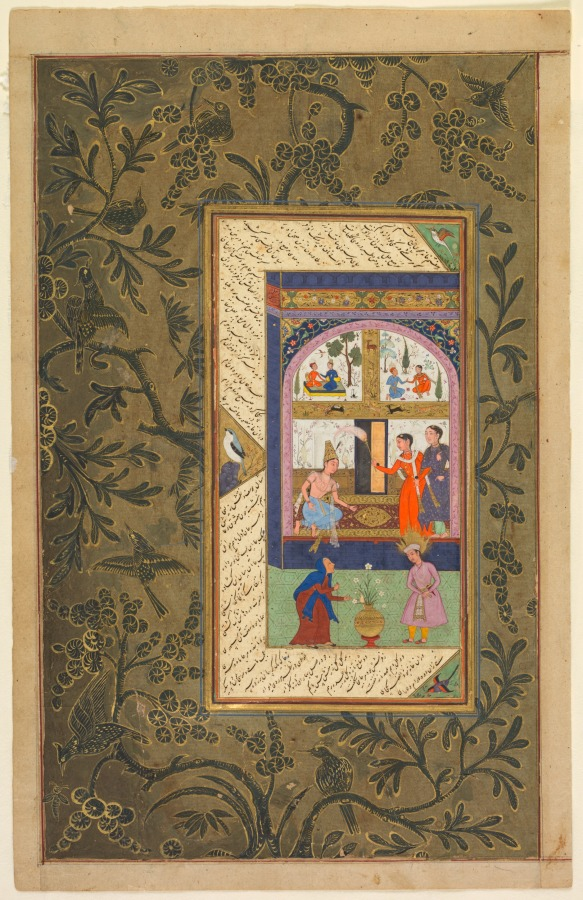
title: Zulaykha in her palace and as an elderly woman with Joseph (recto), from a Panj Ganj (Five Treasures) of Abd al- Rahman Jami (Persian, 1414–1492)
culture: Western Afghanistan, Herat (text); Mughal India (paintings)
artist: Mushfiq (Indian, active early 1600s)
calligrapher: Sultan 'Ali al-Mashadi (Iranian, 1430–1520)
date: 1603–7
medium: Gum tempera, ink, and gold on paper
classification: Painting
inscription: [[Upper left of painting, against a red background, in nasta’liq script]] ' amal - i Mushfiq sana 1015 Text on verso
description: The golden pot of white narcissus flowers at the bottom center of the painting signals that Zulaykha, leaning on her staff to the left, will imminently have her youth and beauty restored. In this Persian retelling of the Old Testament account from the Bible, Zulaykha lusted after Joseph, even though she was already married to Potiphar. Joseph, with the golden halo, resisted her advances until she became a widow and retained his youth, because of his extreme virtue. Above, Zulaykha as a young woman waits for Joseph in her house where murals of them as a happy couple are painted on the walls.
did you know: Zulaykha is shown four times: twice in the murals, seated in the center, and below when she is much older.